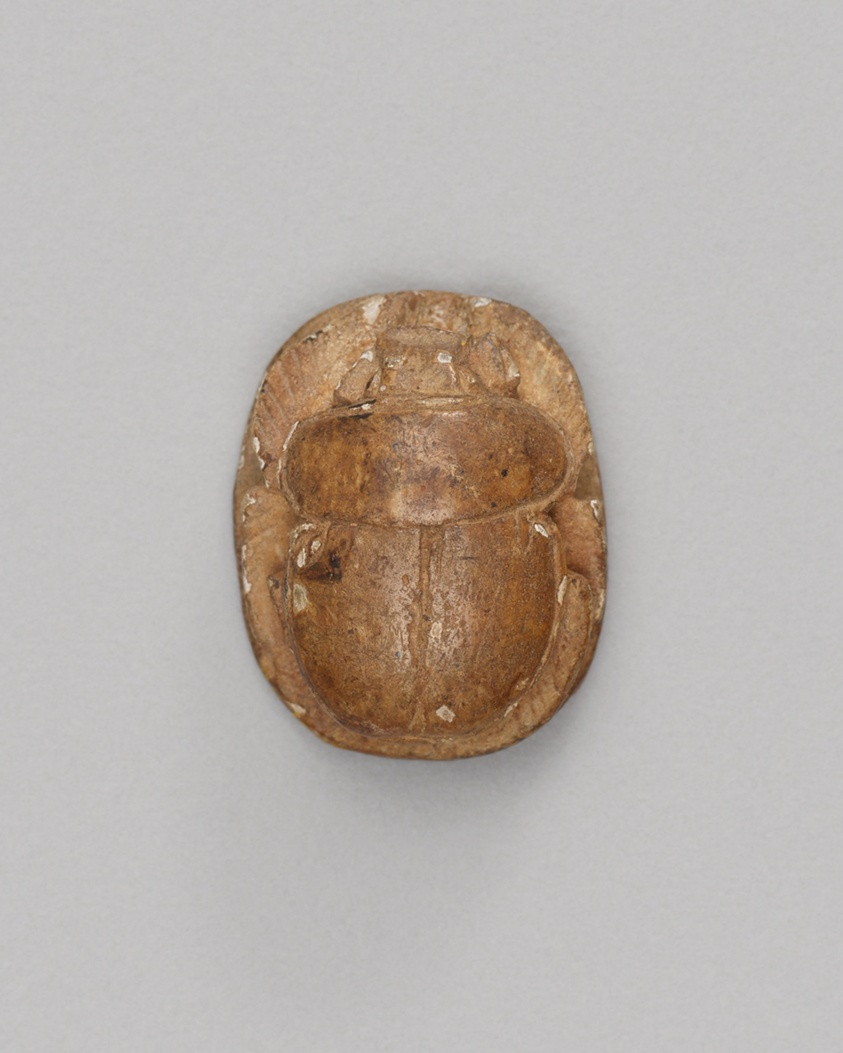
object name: Costume and Accessories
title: Scarab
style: egyptian, third intermediate period, late period (egyptian), ancient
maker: Egyptian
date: Third Intermediate Period–Late Period, Dynasties 21–26 (about 1069–525 BCE)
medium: Steatite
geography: Egypt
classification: scarab; ancient art; costume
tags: scarab beetle, insects, eye of Horus, animals